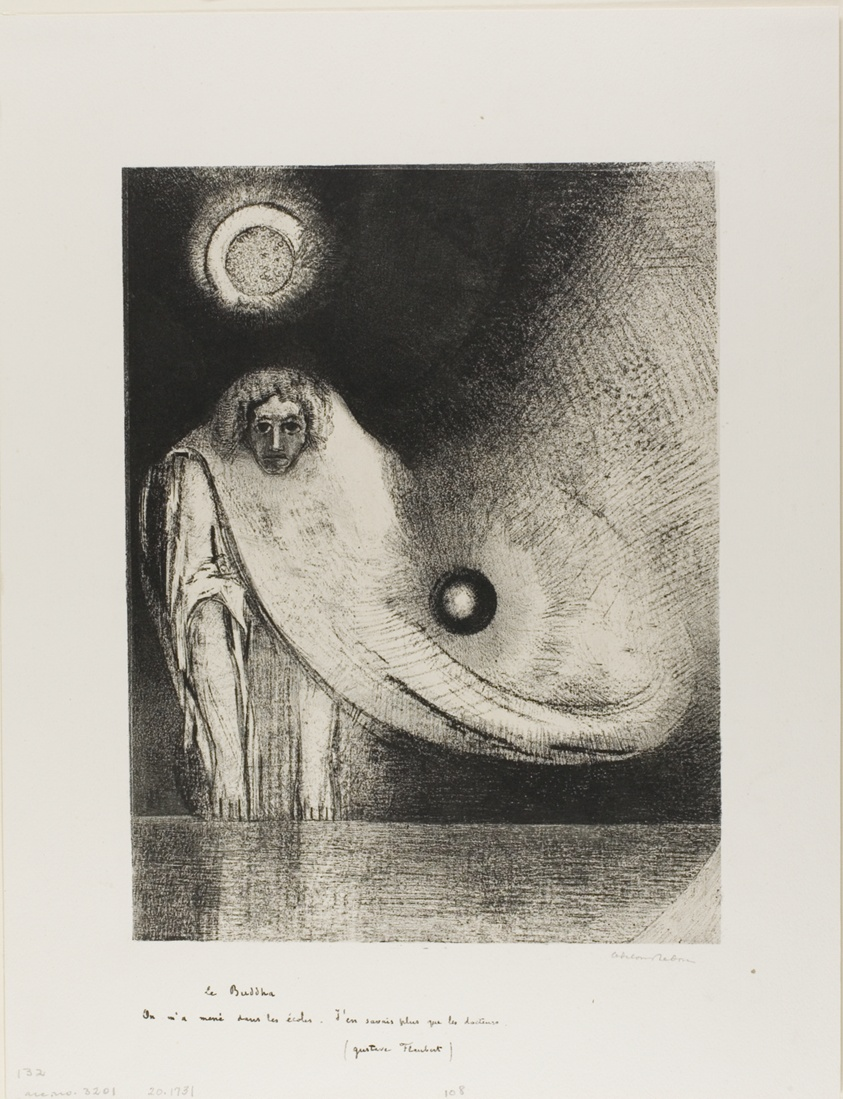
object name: Print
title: The Buddha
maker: Odilon Redon (French, 1840-1916)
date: 1895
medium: Lithograph in black on ivory China paper laid down on ivory wove paper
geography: France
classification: lithograph; print; prints and drawing; paper